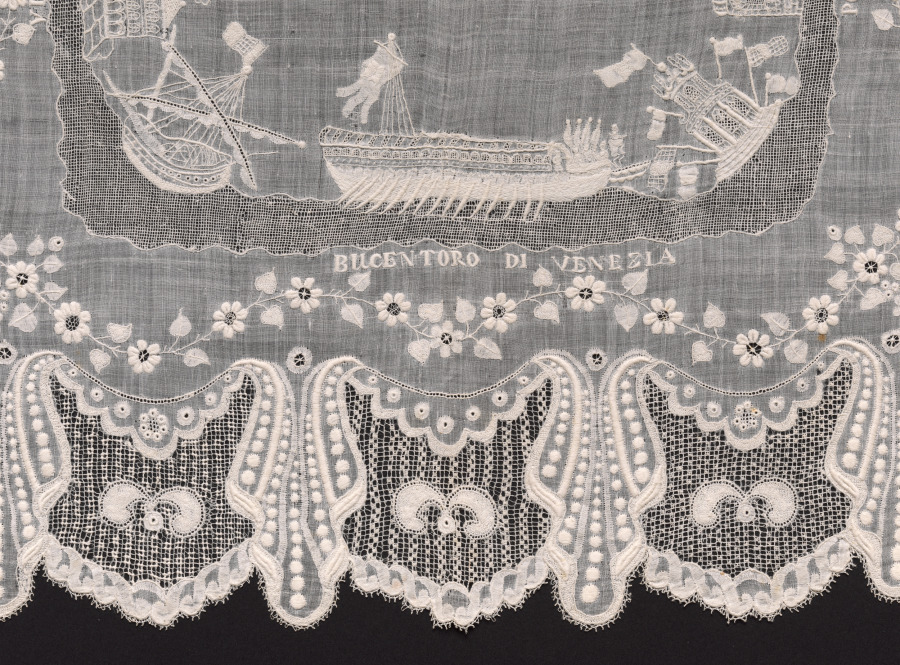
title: Handkerchief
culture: Italy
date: 1800s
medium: Plain weave linen with needle lace (drawnwork) and embroidery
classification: Embroidery